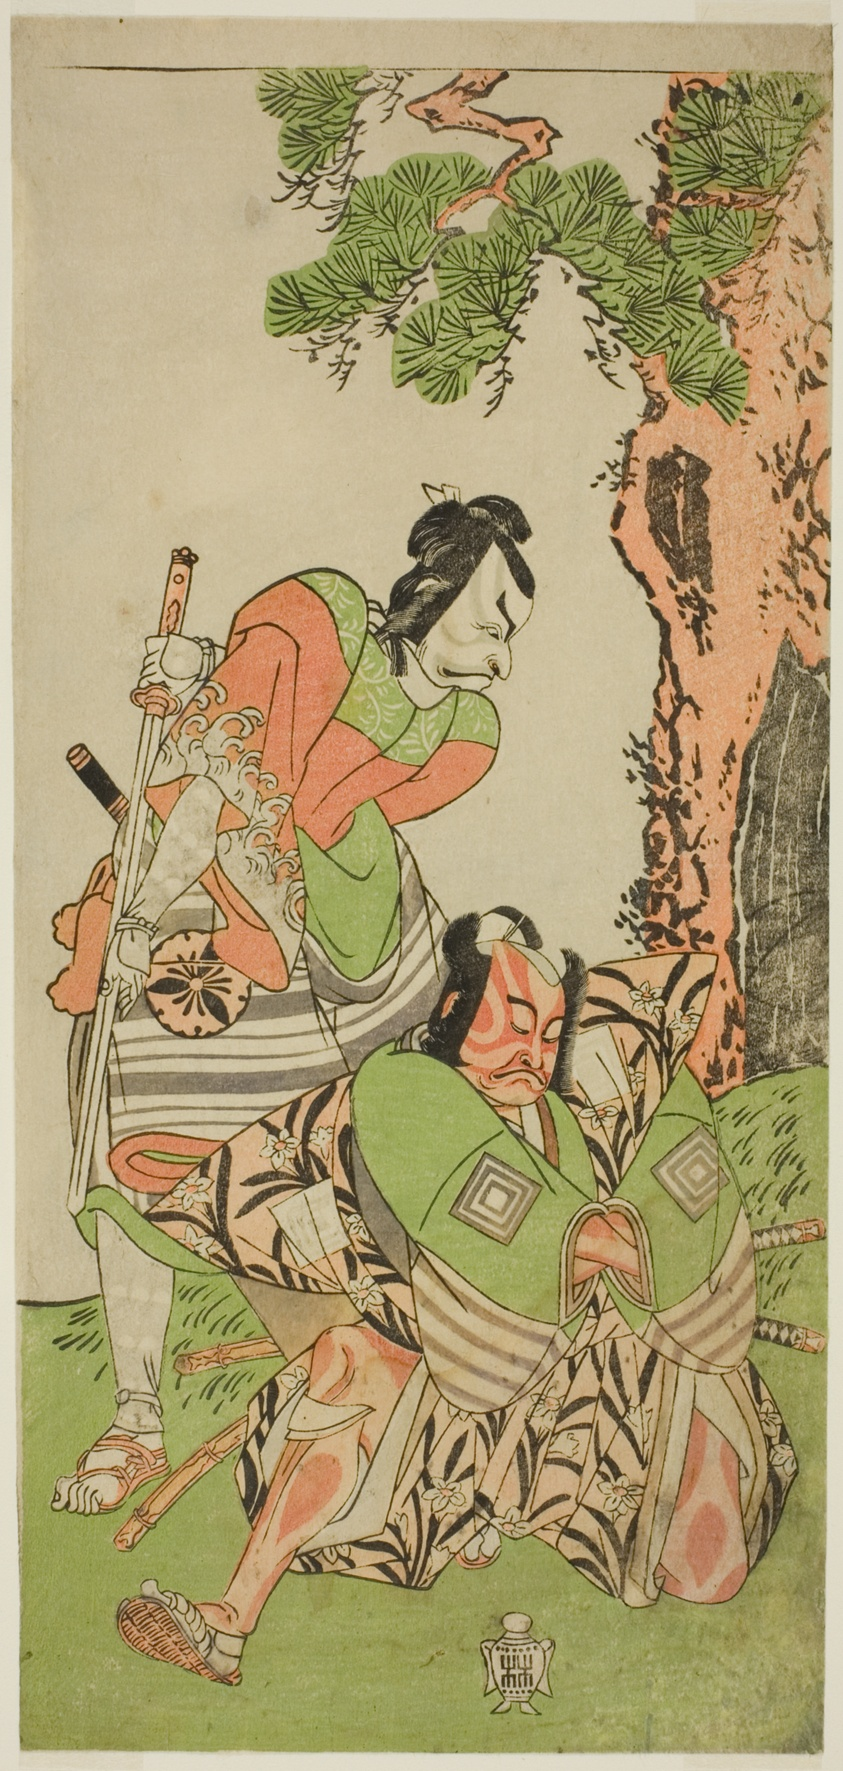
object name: Print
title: The Actors Ichikawa Danzo III as I no Hayata Tadazumi (right), and Matsumoto Koshiro II as Osada no Taro Kagemune Disguised as Yatsurugi Zaemon (left), in the Play Nue no Mori Ichiyo no Mato, Performed at the Nakamura Theater in the Eleventh Month, 1770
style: Japanese (culture or style)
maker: Katsukawa Shunsho 勝川 春章; Japanese, 1726-1792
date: c. 1770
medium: Color woodblock print; hosoban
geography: Japan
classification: woodblock print; print; asian art